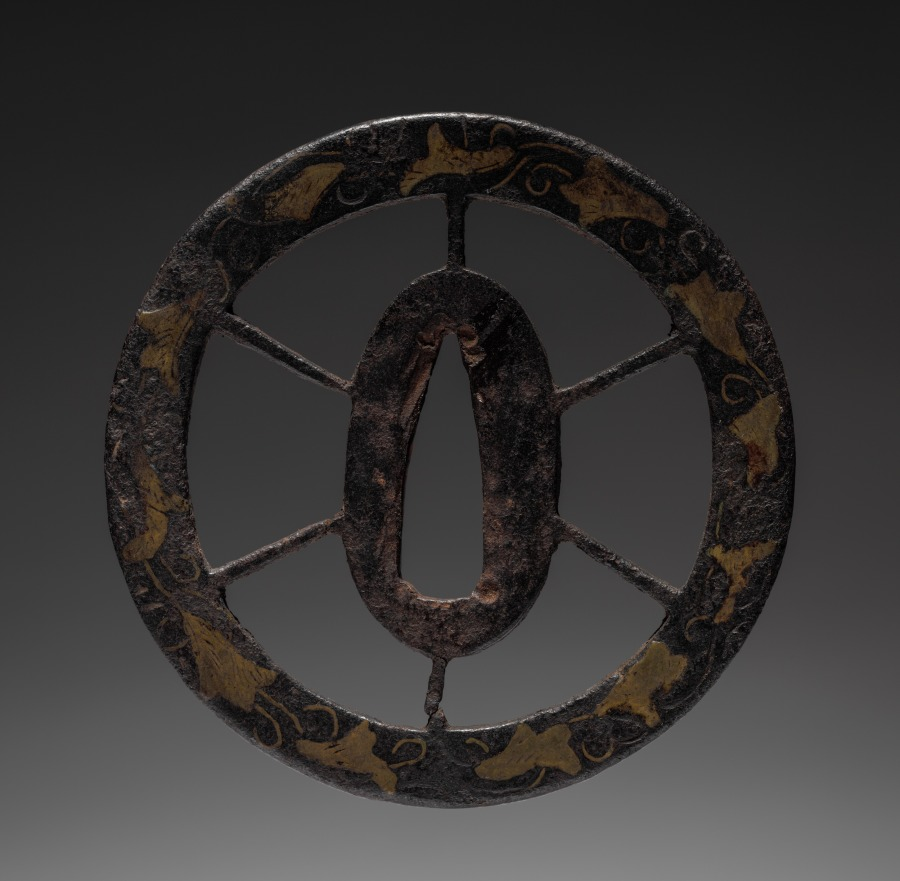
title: Sword Guard (Tsuba)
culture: Japan, possibly Edo period (1615-1868)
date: c. 1615–1868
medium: iron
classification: Arms and Armor